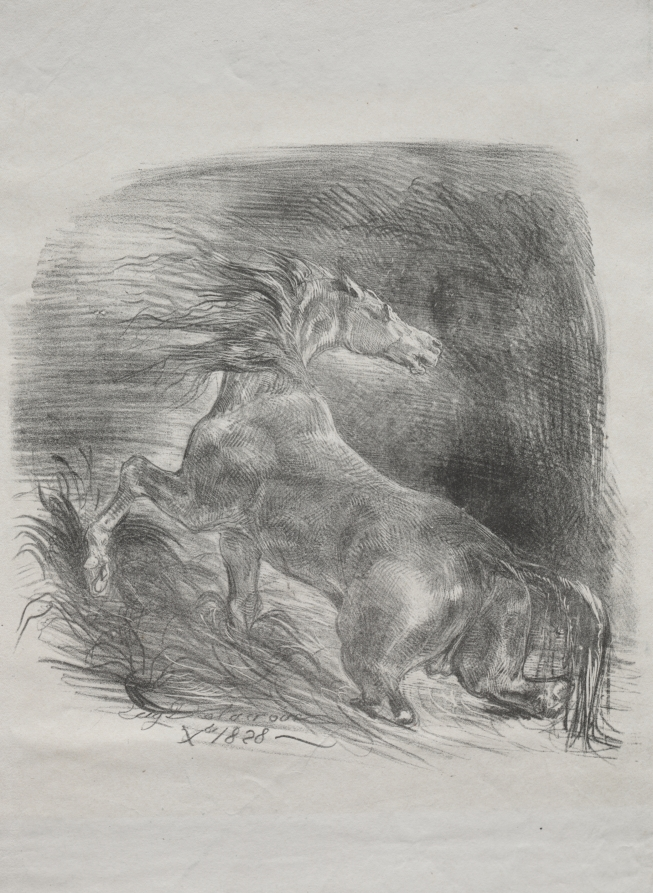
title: The Wild Horse, or Frightened Horse Leaving the Water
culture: France, 19th century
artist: Eugène Delacroix (French, 1798–1863)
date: 1828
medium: lithograph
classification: Print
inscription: signed and dated, lower center, in stone: E. Delacroix Xe 1828